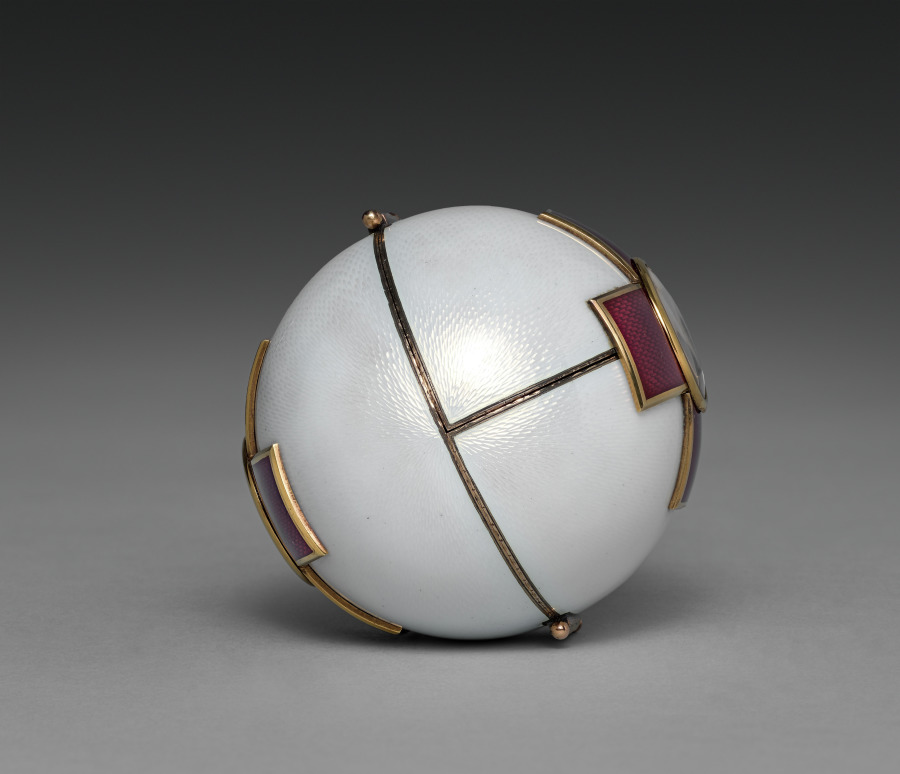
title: Imperial Red Cross Easter Egg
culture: Russia, St. Petersburg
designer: Peter Carl Fabergé (Russian, 1846–1920)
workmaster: Henrik Wigström (Russian, 1862–1923)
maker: House of Fabergé (Russian, 1842–1918)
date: 1915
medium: gold, silver gilt, enamel, glass, ivory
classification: Miscellaneous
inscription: inscribed on interior of egg: symbols for Alpha and Omega and imperial crown for Alexandra Feodorovna; 1915; inscriptions in Cyrillic, Old Church Slavonic, and Roman letters which identify Sts. Olga and Tatiana and presumably describe the central scene of the triptych.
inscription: Inscribed on silk velvet and satin lined case: double-headed eagle, Fabergé, Petersburg, Moscow, London (all in Cyrillic on lining of case); 17.559, abbreviation for "Red Cross" (in Cyrillic in red ink on outside of case).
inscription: Hallmarks: 72, Kokoshnik, lower case alpha in script [assay mark of St. Petersburg, 1908-26]; H.W. [initials of workmaster Henrik Wigström]; Fabergé (in Cyrillic).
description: The House of Fabergé made two imperial Easter eggs in 1915 that honored the contributions of Tsarina Alexandra and her two eldest daughters, Olga and Tatiana, to the war effort as Red Cross Sisters of Mercy. Compared to other Fabergé eggs elaborately ornamented with jewels, the eggs reflected the mood of austerity in Russia during World War I. This version becomes an icon when opened, revealing miniatures of the patron saints of the tsarina’s daughters. After the Russian Revolution, this relic of the Tsarist past was sold by the Soviet government to raise needed cash for the treasury.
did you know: This egg was confiscated by the Bolsheviks during the Russian Revolution and sold by the government of Josef Stalin in the 1930s to raise money for the Soviet treasury.